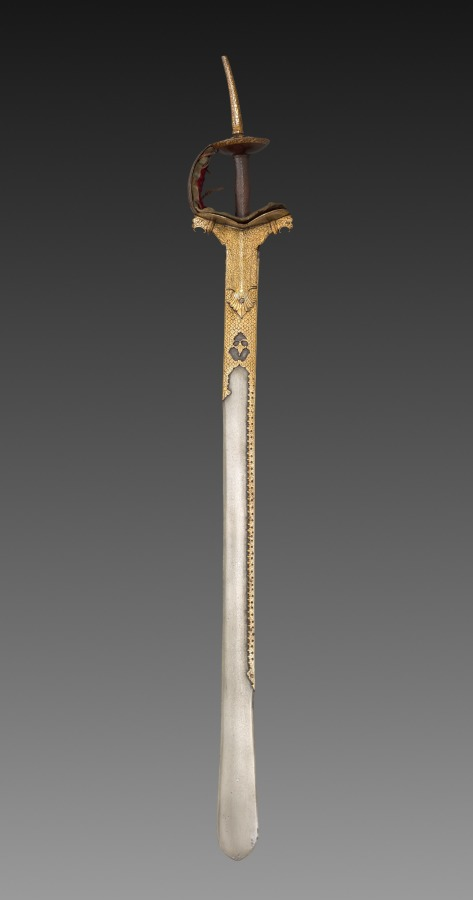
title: Sword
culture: India, perhaps Deccan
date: 1700s–1800s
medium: Watered steel blade with iron hilt inlaid with gold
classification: Arms and Armor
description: Straight swords were typical of those used among military and aristocratic circles in the southern regions of the Deccan, in contrast to the curved swords favored by Central Asian equestrians. Increased contact between the Mughal north and the Deccan south during the 1600s led to the appearance of the Deccan-style sword in courtly portraits made during the time of Jahangir and Shah Jahan, and later.